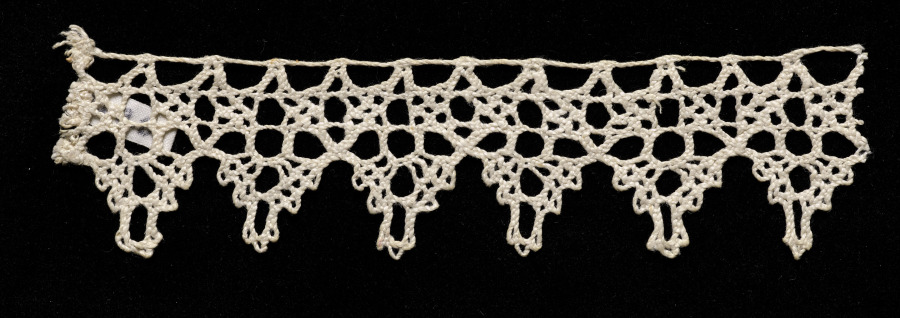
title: Lace Edging with Points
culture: Italy, Venice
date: 1540s–50s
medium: Bobbin lace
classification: Lace